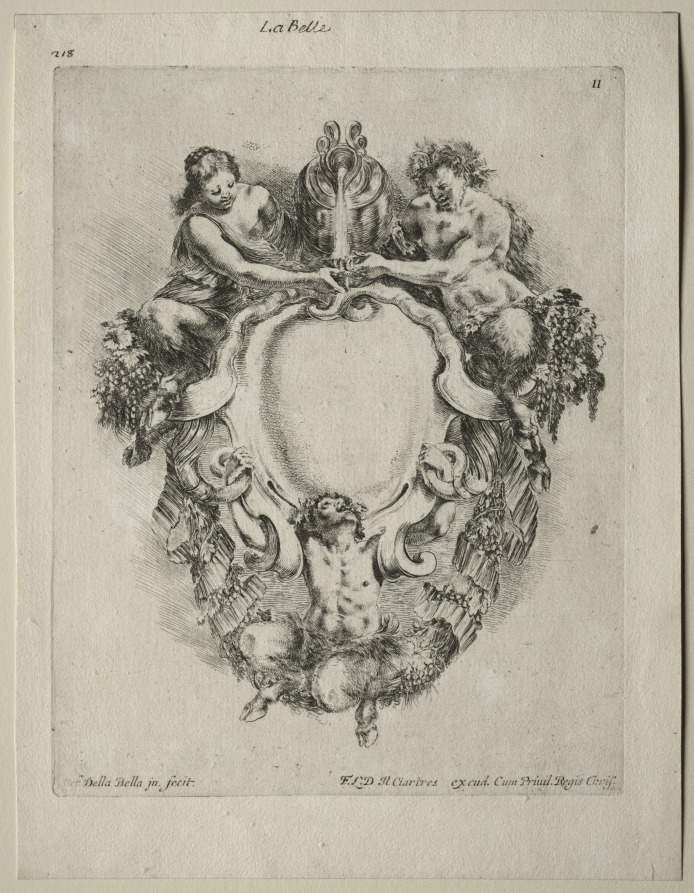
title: Collection of Various Caprices and New Designs of Cartouches and Ornaments: No 11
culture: Italy, 17th century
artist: Stefano Della Bella (Italian, 1610–1664)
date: 1646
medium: etching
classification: Print